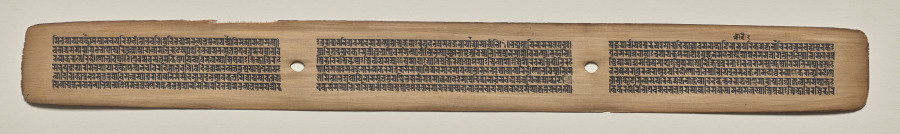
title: Text, Folio 102 (recto), from a Manuscript of the Perfection of Wisdom in Eight Thousand Lines (Ashtasahasrika Prajnaparamita-sutra)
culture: Eastern India, Bihar, Vikramashila Monastery. Painting: Nepal, Kathmandu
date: Sunday, September 14, 1119 (year 239 of the Newar Samvat in the month of Ashvina)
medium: gum tempera and ink on palm leaves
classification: Painting